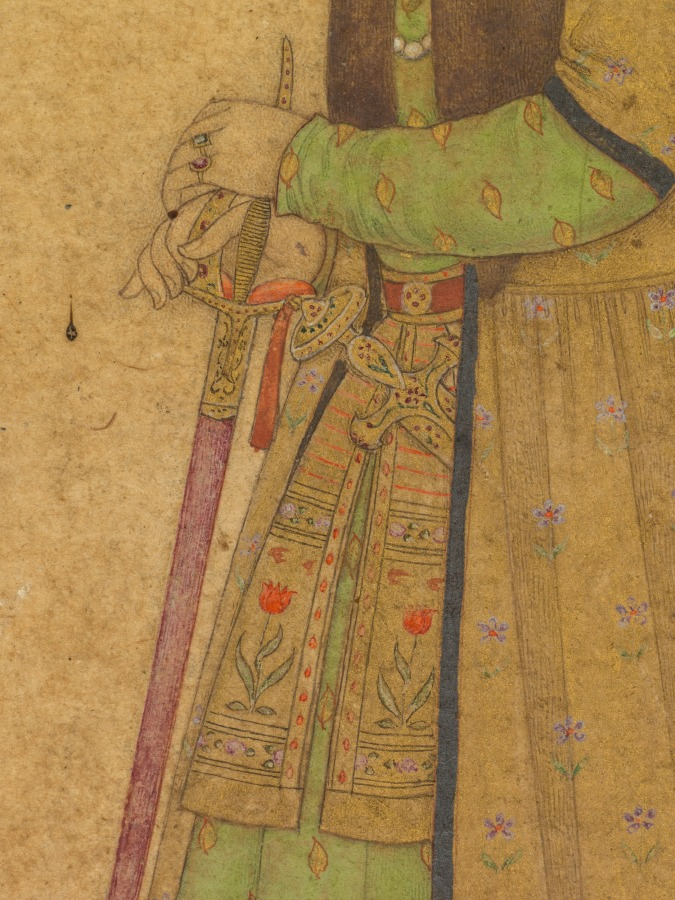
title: Portrait of Raja Ram Singh of Amber (r. 1667-1688) with a Deccan Sword (recto)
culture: India, Mughal, 17th century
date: c. 1680–85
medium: Gum tempera and gold on paper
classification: Painting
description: The sensitive, naturalistic rendering of weariness and forbearance in the face belies the trappings of favor bestowed on Ram Singh by the Mughal emperors Shah Jahan and Alamgir, whom he served as courtier and general between 1643 and 1688. He was a Hindu ruler from the kingdom of Amber in Rajasthan, under the control of the Mughal empire. Spending most of his life at the imperial court or leading military expeditions for the Mughals, this portrait was included in a Mughal album and inscribed with an Urdu verse indicating his value to the empire: "wherever he has led an expedition, victory is his." He wears a sumptuous coat of honor with a fur collar, woven with gold threads and floral sprigs and costly rubies, emeralds, and pearls. The straight sword with enameled hilt may be the one gifted to him by the emperor upon his succession to the throne as king of Amber in 1667. His long history of service at the imperial court, however, was checkered with troubles, including his allegiances with failed successors of Shah Jahan and the escape of the rebel Shivaji under his watch.